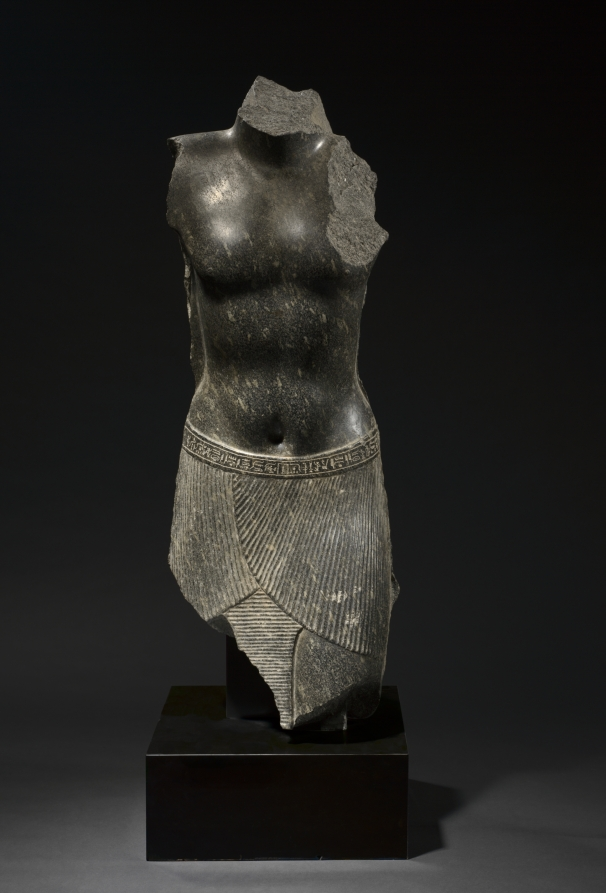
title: Torso of Amenpayom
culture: Egypt, Greco-Roman period (332 BCE–395 CE), Ptolemaic dynasty (305–30 BCE)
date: probably 200–100 BCE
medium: granodiorite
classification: Sculpture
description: This magnificent life-sized torso is inscribed for Amenpayom, the great army general of the district of Mendes in the Nile Delta. By the end of the Ptolemaic dynasty (305-30 BC) when this statue was made, the Egyptians could draw on 3,000 years of expertise carving hard stone. Enough remains to show that Amenpayom was represented in the traditional pose for men: left leg striding forward, arms at his sides, and supported by a back pillar. The subtle, masterful treatment of the undulating musculature and meticulous, flawless polish are hallmarks of this period, when Egyptian artists reveled in the natural beauty of the human form.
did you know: On the back Amenpayom is depicted again worshiping the gods of Mendes, Harpocrates, Banebjedet, and Hatmehit.